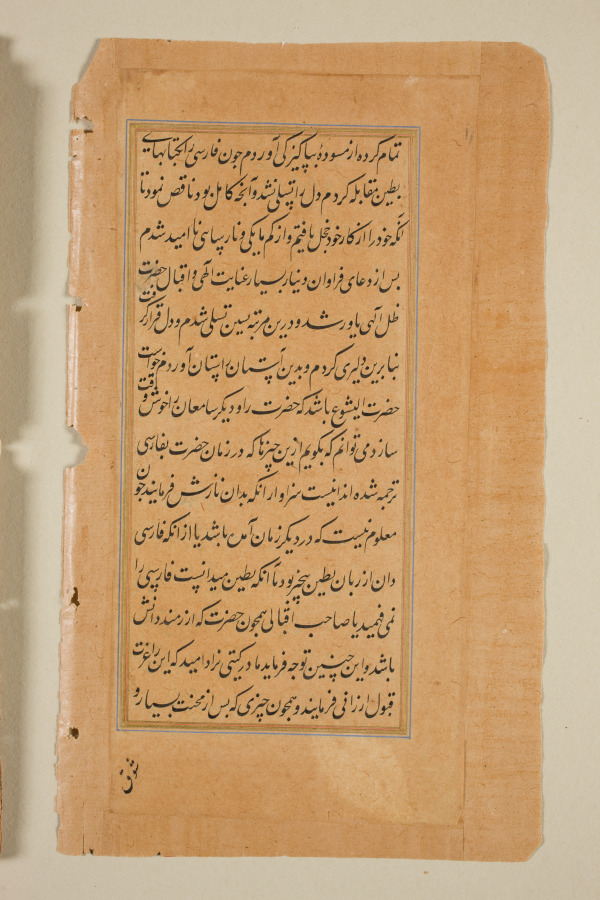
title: Text, Folio 4 (verso), from a Mirror of Holiness (Mir’at al-quds) of Father Jerome Xavier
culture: Mughal India, Allahabad, made for Prince Salim (1569–1627)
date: 1602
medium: Ink and gold on paper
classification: Manuscript